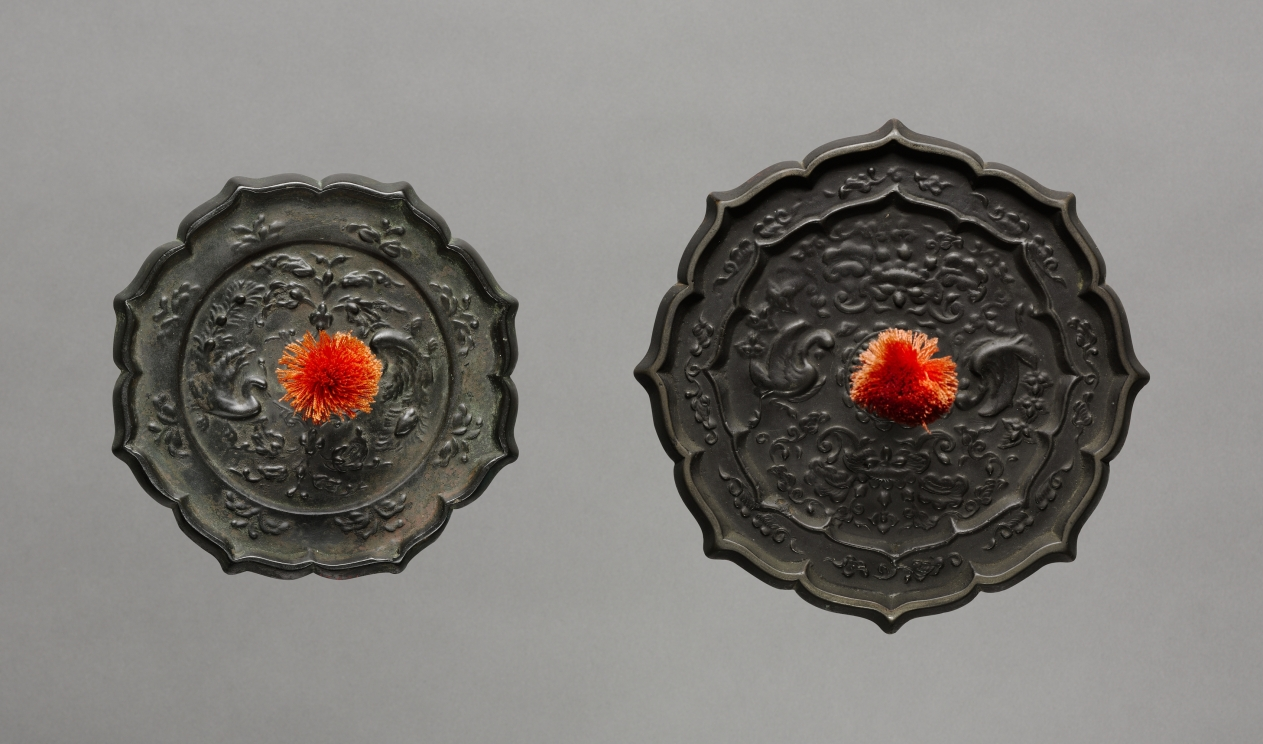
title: Mirror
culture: Japan, Heian period (794–1185)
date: 794–1185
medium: bronze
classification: Metalwork